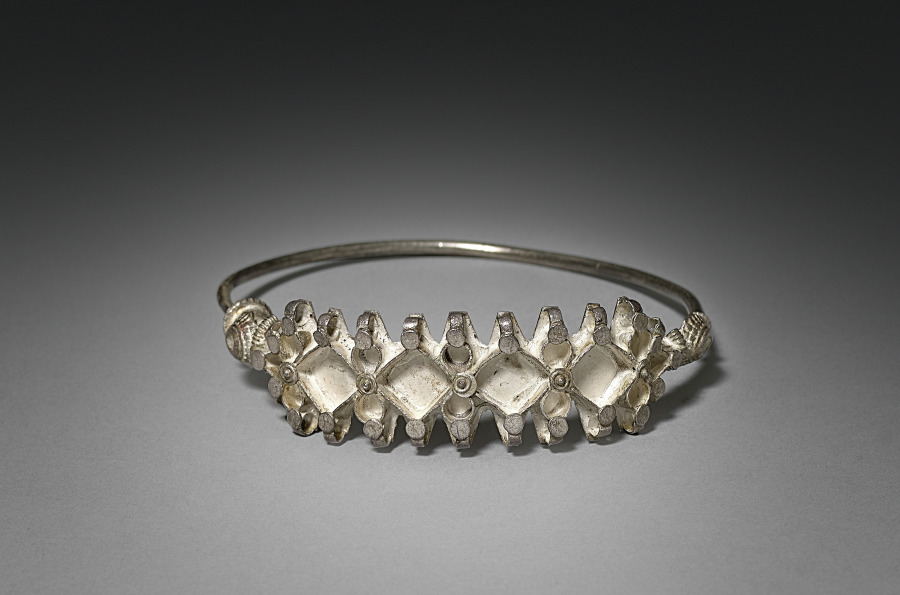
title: Nose Ring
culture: India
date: early 1900s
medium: silver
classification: Jewelry